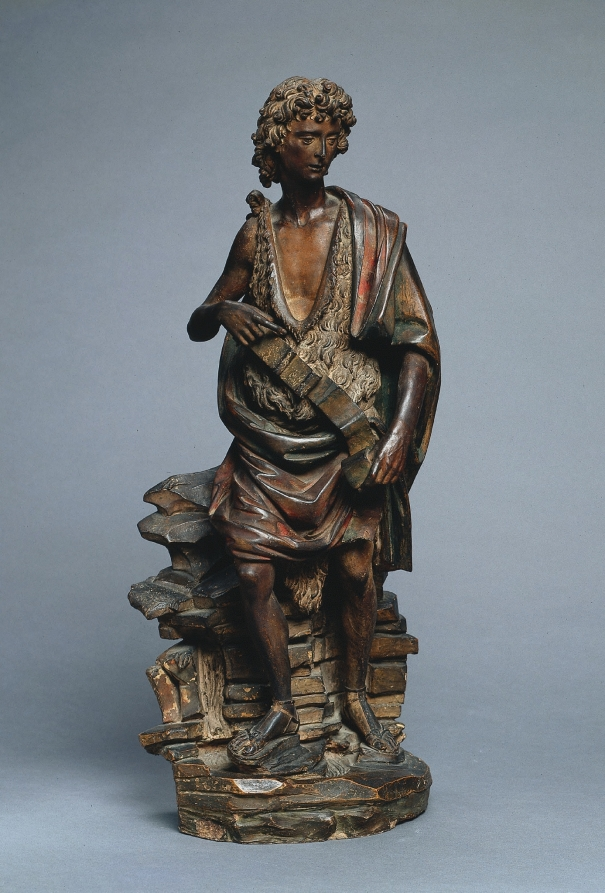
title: Saint John the Baptist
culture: Italy, Florence, 16th century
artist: Master of the Saint John Statuettes (Italian)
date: c. 1500–1525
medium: terracotta with traces of polychromy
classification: Sculpture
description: This statuette belongs to a group of terracotta sculptures representing David (from the OldTestament) and Saint John (from the New Testament) produced by a still unidentified Florentine artist and his studio in the late 1400s and early 1500s. Giventheir scale, it seems likely that these sculptures were intended for use in private homes rather than churches.